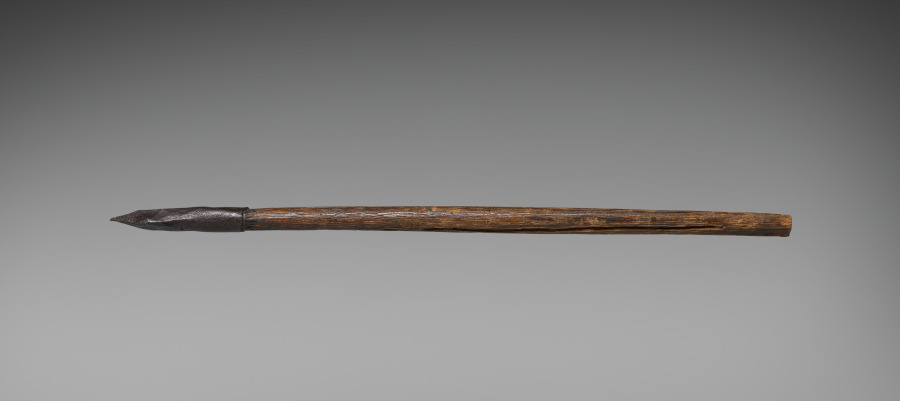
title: Crossbow Bolt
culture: Germany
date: 1600s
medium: wooden shaft, steel head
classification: Arms and Armor